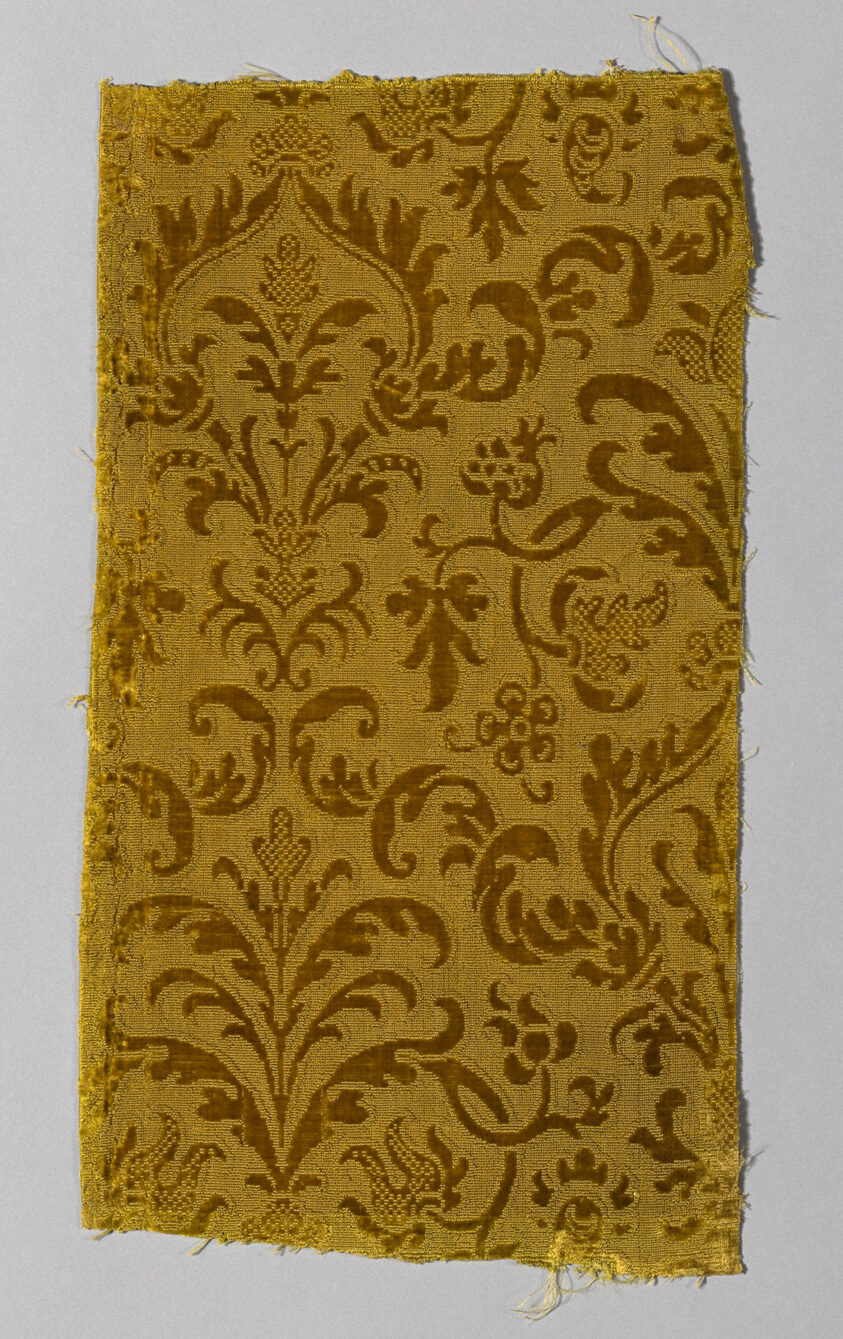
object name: Textile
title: Fragment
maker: Italy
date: c. 1600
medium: Silk, warp-float faced 3:1 broken twill weave with supplementary pile warps forming cut, uncut, and pile-on-pile velvet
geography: Italy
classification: textile; weaving - velvet